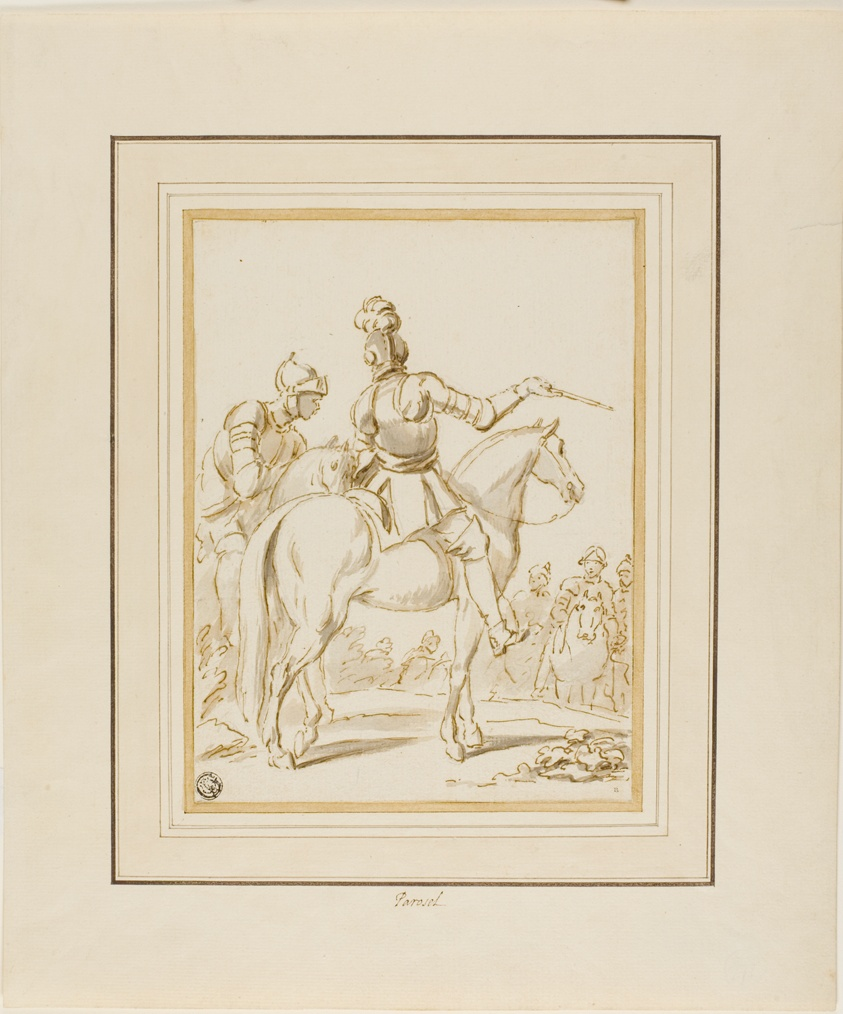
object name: Drawing and Watercolor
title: Knights on Horseback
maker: Charles Parrocel (French, 1688-1752)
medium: Pen and brown ink, with brush and gray wash, over traces of graphite on ivory laid paper, laid down on ivory laid paper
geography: France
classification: pen and ink drawings; drawings (visual works); prints and drawing